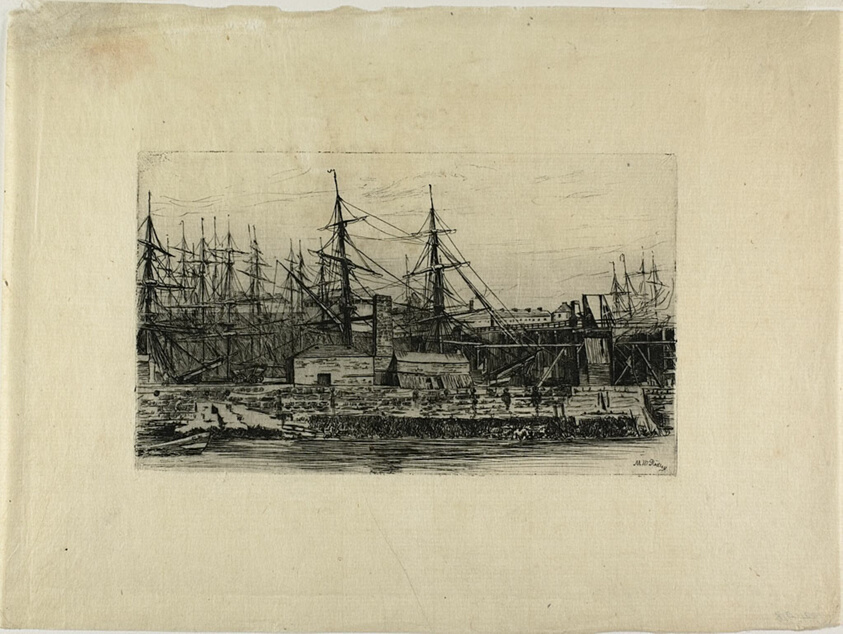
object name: Print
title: Untitled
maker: Matthew White Ridley (English, 1837-1888)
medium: Etching on cream Japanese laid paper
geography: England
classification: etching; print; prints and drawing